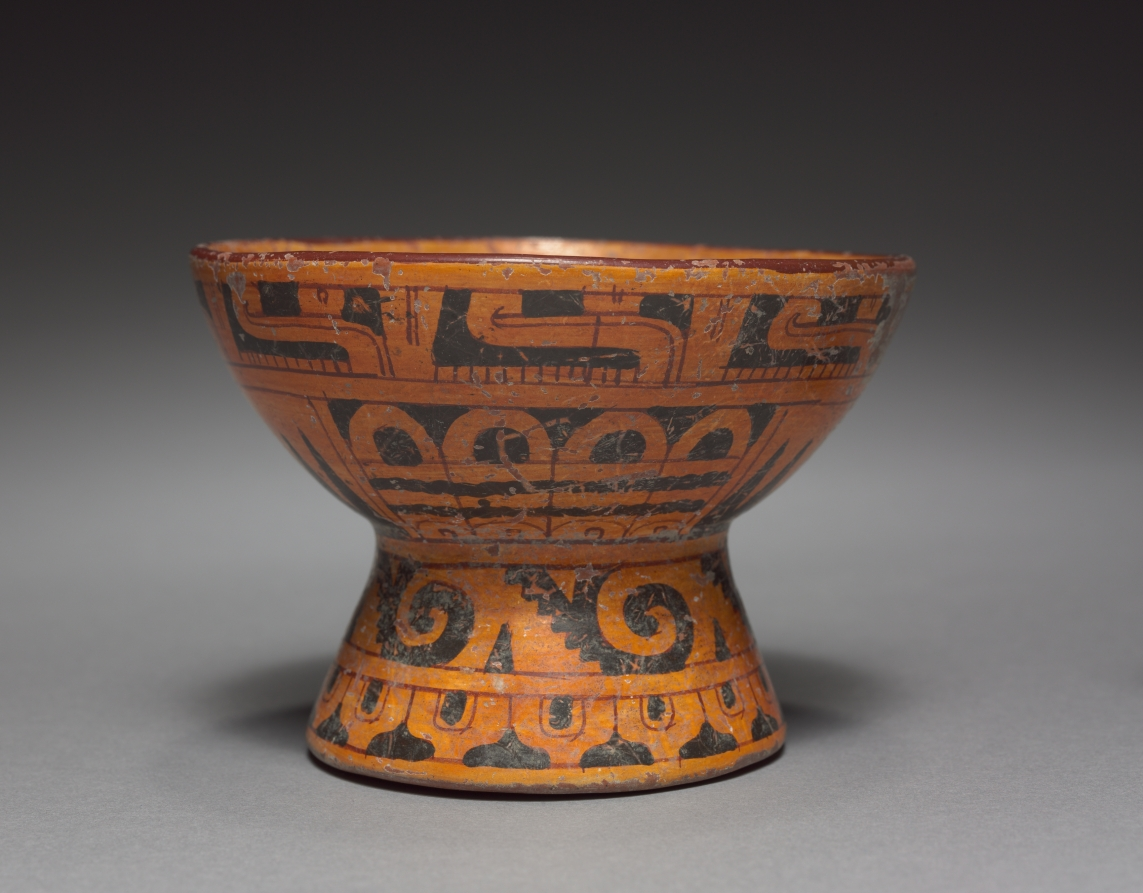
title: Bowl with Rattle Base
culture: Mexico, Cholula?, Mixteca-Puebla Style, 10th-16th century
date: c. 900–1519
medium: earthenware with colored slips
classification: Ceramic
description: The nobility may have used these goblets for a chocolate beverage or for pulque, made from the fermented sap of the maguey cactus. Both are painted with the precision and brilliant colors for which the Mixteca-Puebla style is renowned, and they carry some of the same motifs, such as the band of stylized animal heads at the top. The smaller bowl has a rattle base.